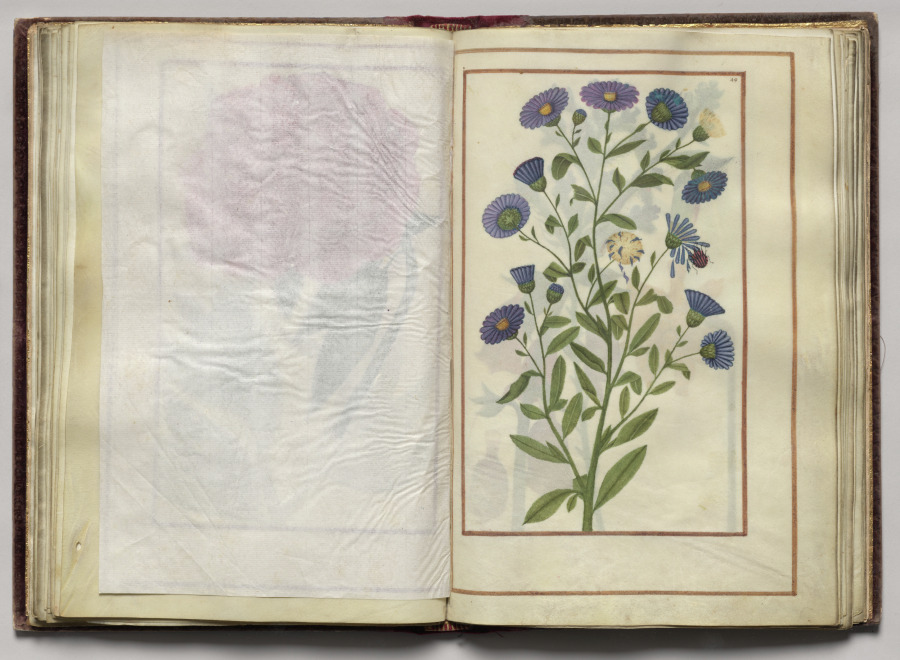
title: Blue Aster, folio 25 (recto), from Florilegium (A Book of Flower Studies)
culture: France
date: 1608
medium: watercolor, ink, silver and gold over occasional traces of pencil, on vellum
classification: Bound Volume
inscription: Dated: Poitiers 1608 (on frontispiece) Signed: On frontispiece in black ink, lower right: Van Kuyk Notation on drawing: Frontispiece: in pencil, lower margin: * élève de Van Kessel, peintre flammand (* in pencil also appears in front of Van Kuyk's name).